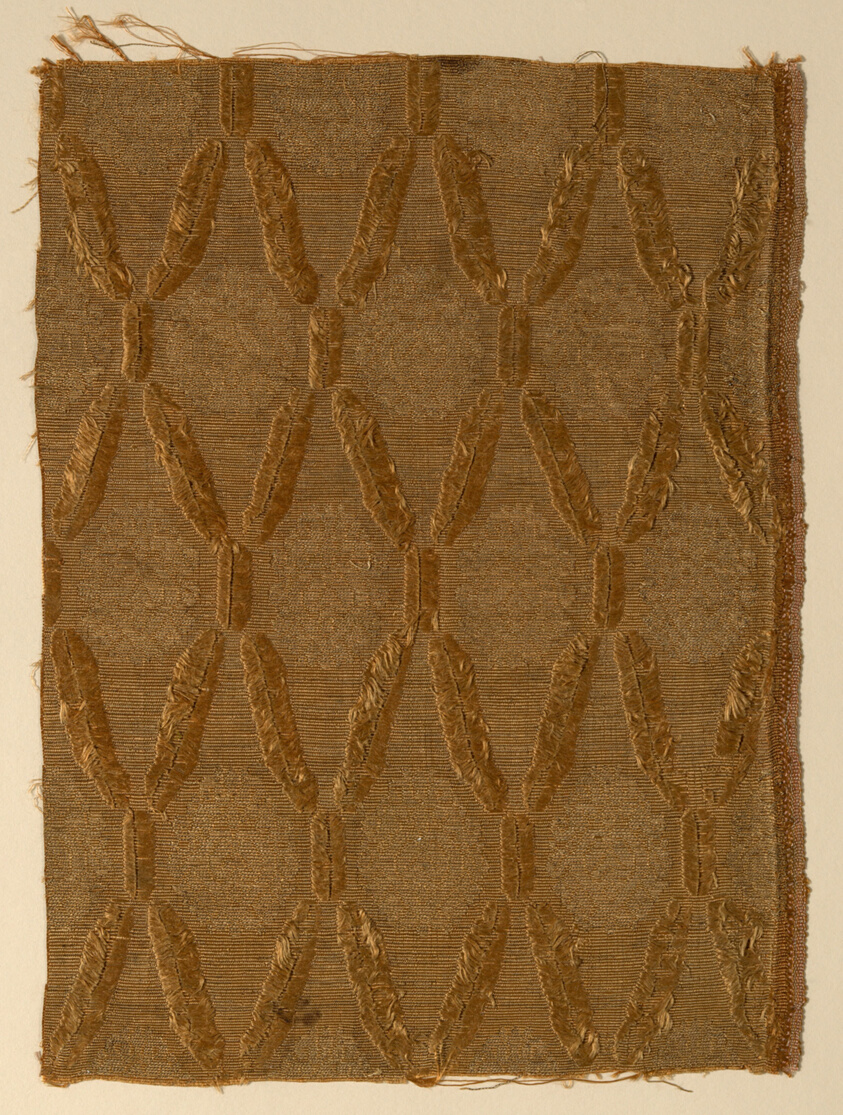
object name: Textile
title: Fragment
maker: Italy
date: 1625/75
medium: Silk, plain compound cloth; brocaded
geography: Italy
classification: textile; weaving